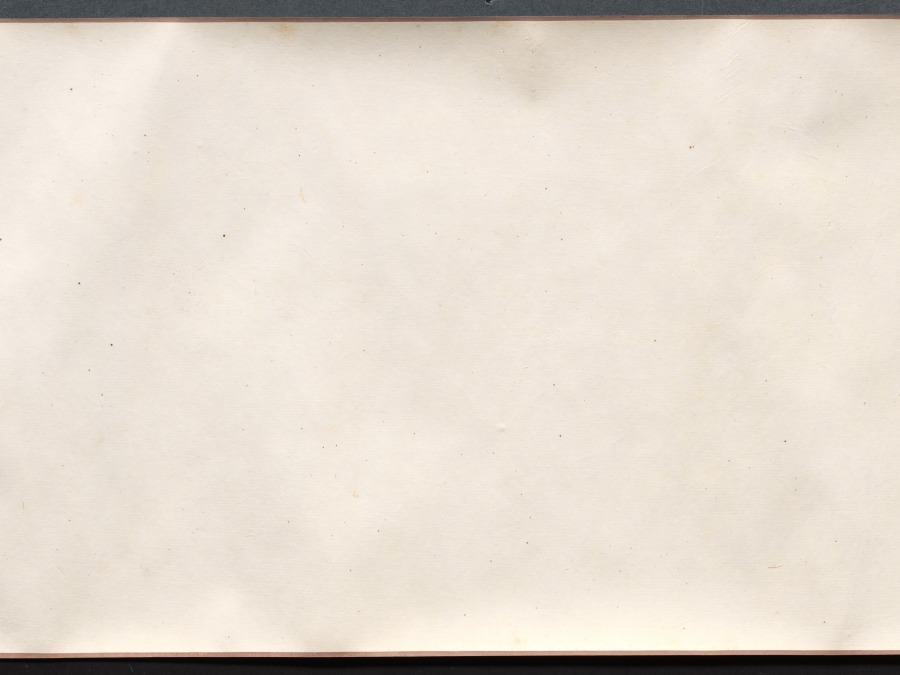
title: Four Poems: Calligraphy in Cursive Script (xingshu)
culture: China, Ming dynasty (1368–1644)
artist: Chen Jiru (Chinese, 1558–1639)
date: 1500s-1600s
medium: handscroll; ink on gold speckled paper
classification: Calligraphy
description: Written in graceful calligraphy with well-composed characters, the artist communicates his thoughts and state of mind in four poems. Characters written in dark, thick strokes convey rhythm, and indicate the moment after the writer had paused to recharge his brush with ink. Chen Jiru was a native of Huating (modern Shanghai). His calligraphy style resembles that of his friend, influential calligrapher Dong Qichang (1555–1636). Unlike Dong, Chen did not pursue government service: he burned his Confucian robes, declined a summons to serve at court, and immersed himself in literature, calligraphy, and painting.